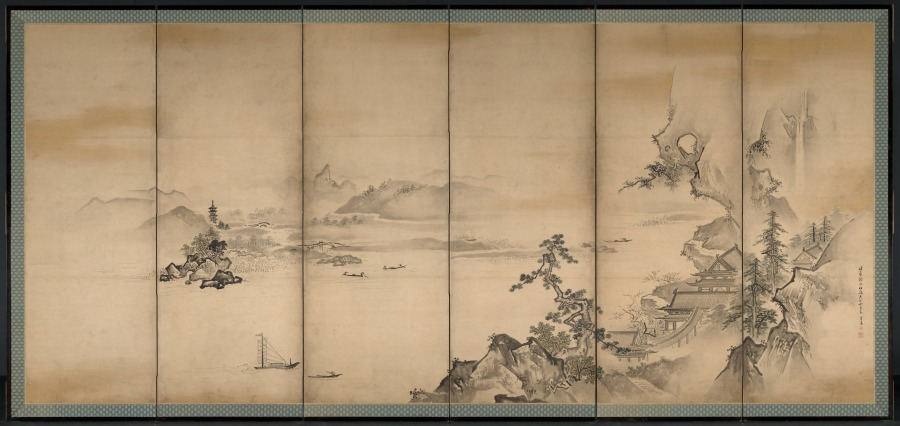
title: The Four Seasons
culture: Japan, Edo period (1615–1868)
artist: Kano Tan’yū (Japanese, 1602–1674)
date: 1668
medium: Six-panel folding screen, ink and slight color on paper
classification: Painting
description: Tan'yū's skills were honed early within the regimen of the Kano family's painting studio. His grandfather, Eitoku (1543–1590) was the Momoyama period's most sought-after painter, a champion of colorful, large-scale painting compositions who worked for several of the country's most powerful leaders. When the young Tan'yū was summoned to Edo in 1617 by the shogun to become a member of the new capital's official painting studio, few opportunities to work on similarly ambitious projects existed. Yet by the end of his career, Tan'yū had supervised the execution and installation of linked mural painting compositions in several of Japan's most prestigious residences and castles. As an official court painter to the first shogun, Tokugawa Ieyasu (reigned 1603–5), and then his successors, Tan'yū appears to have successfully juggled his official duties with private activities as a teacher, as the era's leading connoisseur of classic Chinese and Japanese painting, and as a practicing artist. His surviving compositions as well as thousands of sketches far surpass the oeuvre of any of his contemporaries. While studio assistants surely contributed to his oeuvre, just as later imitators consciously confused his accomplishments, a clearer image of the painter has emerged in recent years that better conforms with his contemporary acclaim as recorded in seventeenth- and eighteenth-century documents. Tan'yū can now be seen as an artist adept in virtually all traditional ink painting subject matter, which he often presented in novel interpretations. Equally important are his rare screen (byōbu) compositions executed in a pure yamato-e manner with vivid mineral pigments on a gold-foil background. This pair of byōbu presents Tan'yū's more orthodox approach to academic ink painting methods embracing Chinese themes that had been interpreted by numerous Japanese ink painters over the centuries. Thus a typical view of residences and human activities set along the shores of an impressive river (or lake) is enlivened by the Japanese proclivity for including seasonal references. Proceeding from right to left, the viewer passes sequentially from spring to the snow-laden branches of winter. Tan'yū lends considerable atmospherics to the panorama in his use of misty cloud banks, frequently set off by sharp, darkened ink lines or whole areas of ink washes of variegated tonalities. The spring and summer views are particularly notable in this regard, as is the presence of the artist's signature on both byōbu, attesting to their completion in Tan'yū's sixty-seventh year (1668)—50 years after he left Kyoto for the capital, and 30 years following his adoption of the artist name "Tan'yū" (in 1635). From 1622, when he began work on the mural paintings for Edo castle (the shogun's formal residence), through the completion of the painting cycle in 1636 for the Tokugawa family mausoleum in Nikkō to the north of Edo, Tan'yū's skills as head of an accomplished painting studio as well as a master painter found their most impressive expression in large-scale compositions. In 1638 he received the honorary Buddhist title Hōgen (Eye of the Law). It is intriguing therefore that relatively few independent byōbu paintings from the master's hand survive, particularly documented early works.